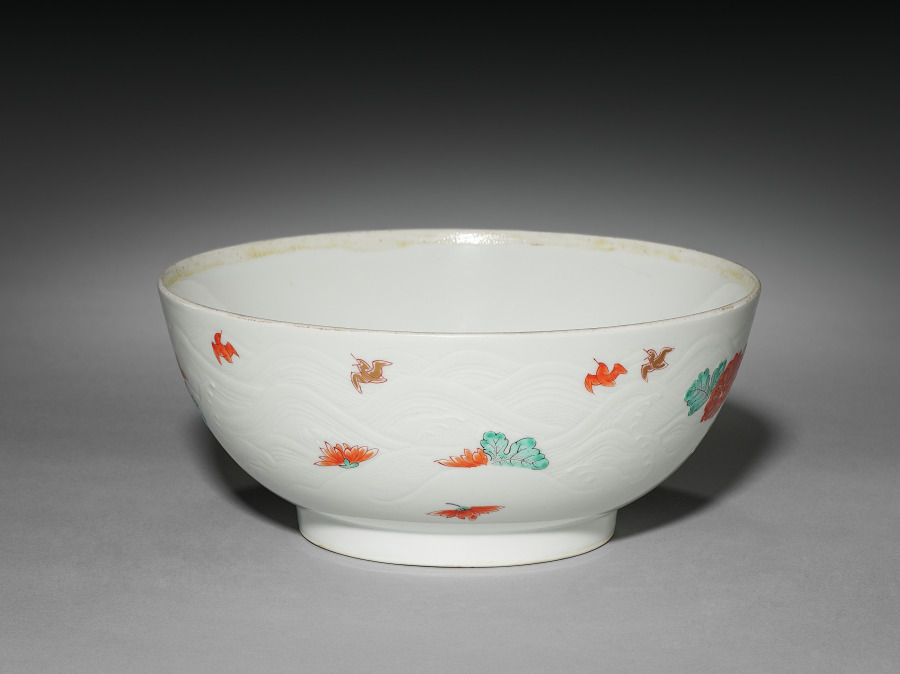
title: Covered Bowl with Chrysanthemums and Chidori: Kakiemon Ware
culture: Japan, Edo period (1615–1868)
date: early 1700s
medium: porcelain with decoration in colored enamels; molded design of waves on exterior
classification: Ceramic